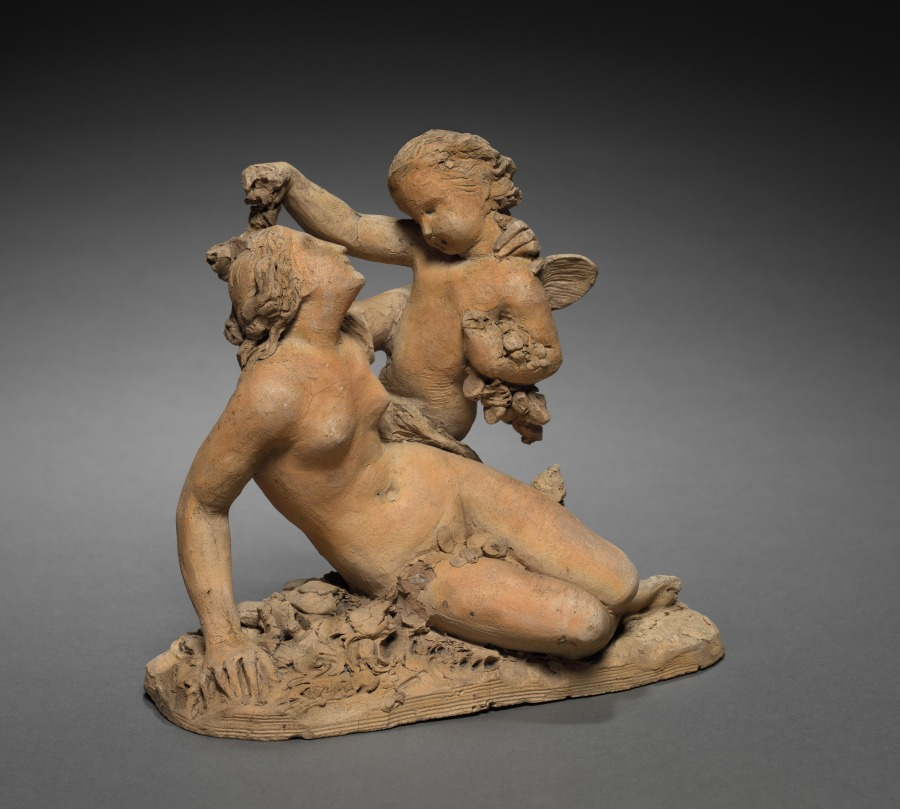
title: Venus and Cupid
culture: France, 19th century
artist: Jean-Jacques Feuchère (French, 1807–1852)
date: c. 1840–1850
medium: terracotta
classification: Sculpture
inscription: in ligature incised into base at front right corner: "Feuchere"; below are some marks that might be a date, but are illegible.